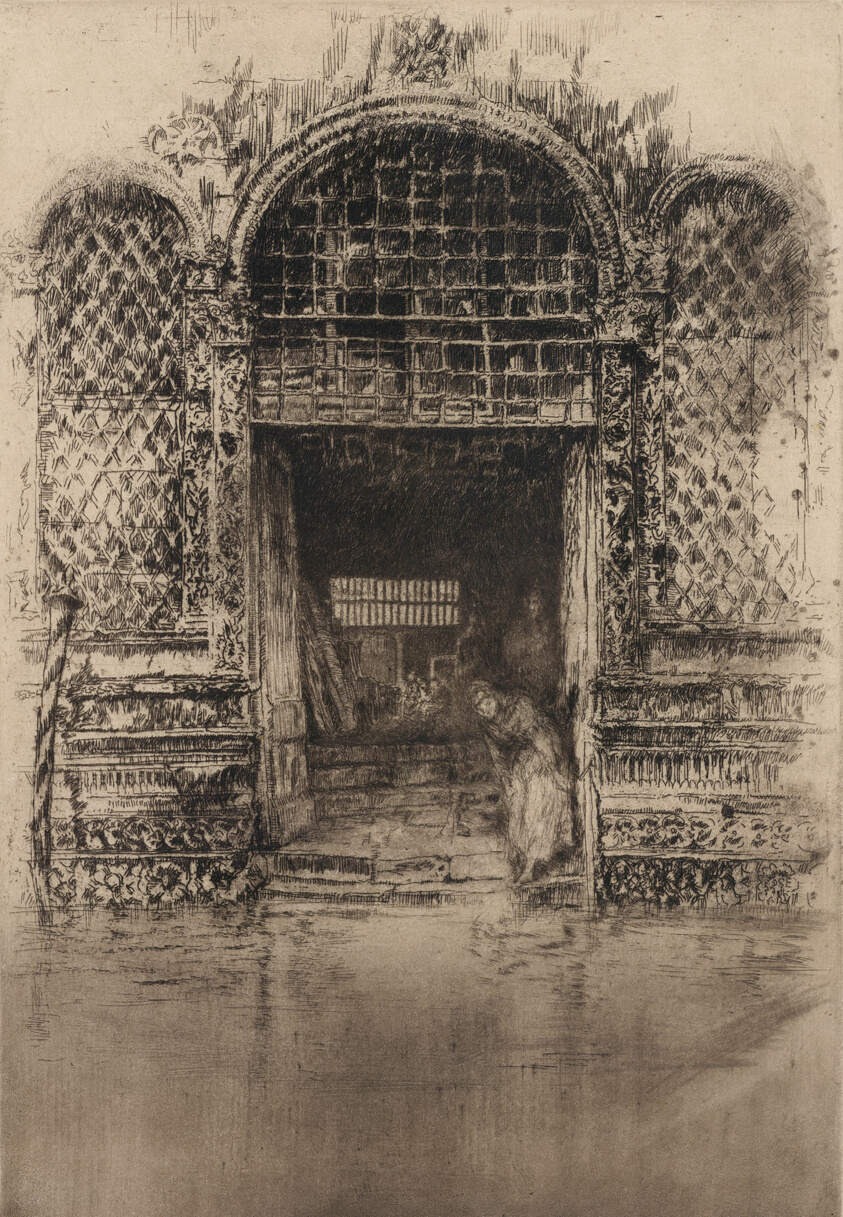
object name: Print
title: The Doorway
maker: James McNeill Whistler (American, 1834-1903)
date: 1879/80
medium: Etching, drypoint and roulette with foul biting in warm black, with selective wiping of plate tone, on cream laid paper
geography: United States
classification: etching; foul biting; print; prints and drawing; roulette; drypoint; paper